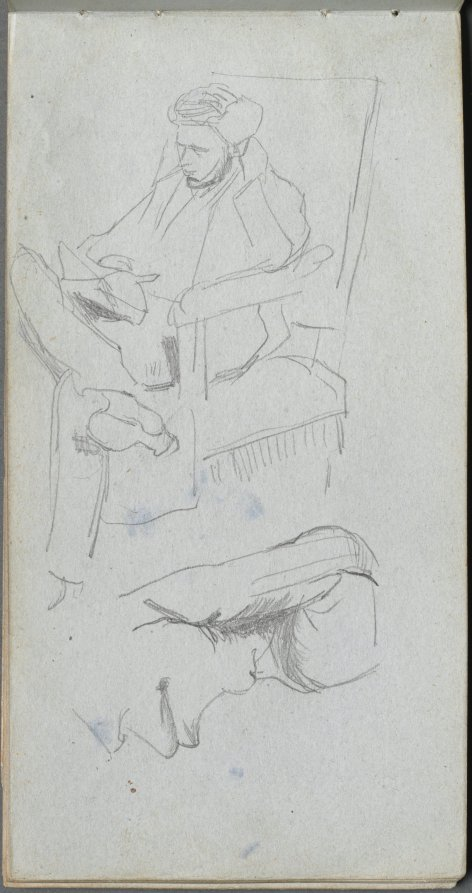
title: Sketchbook, page 24: Seated Male Figure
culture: France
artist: Ernest Meissonier (French, 1815–1891)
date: c. 1860s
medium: graphite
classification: Bound Volume